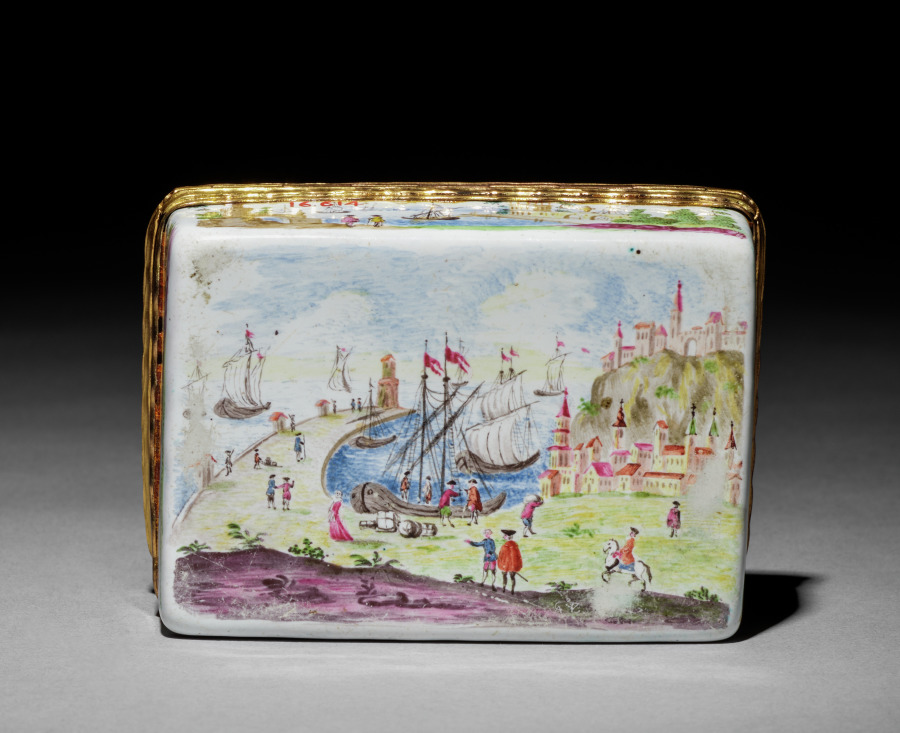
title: Snuff Box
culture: Austria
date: c. 1750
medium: enamel on copper with metal mounts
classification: Miscellaneous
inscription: on top there are a number of inscriptions in black: "Roma," "Trevere R," "C:ST: Ang" (for Castello San Angelo), "S: Pe:" (for San Pietro), "S.G.L." (probably for San Giovanni Laterano). on interior of lid: "WIENNE."